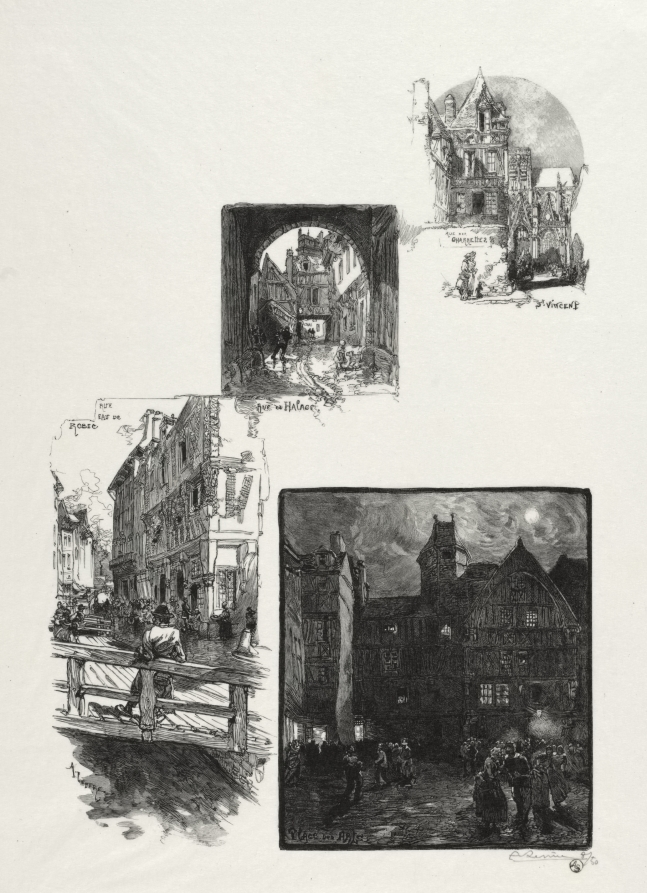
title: Rouen Illustré: Rue des Charretes; Rue de Halage; Rue Eau de Robec; Place des Arts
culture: France, 19th century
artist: Auguste Louis Lepère (French, 1849–1918)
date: 1896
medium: wood engraving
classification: Print